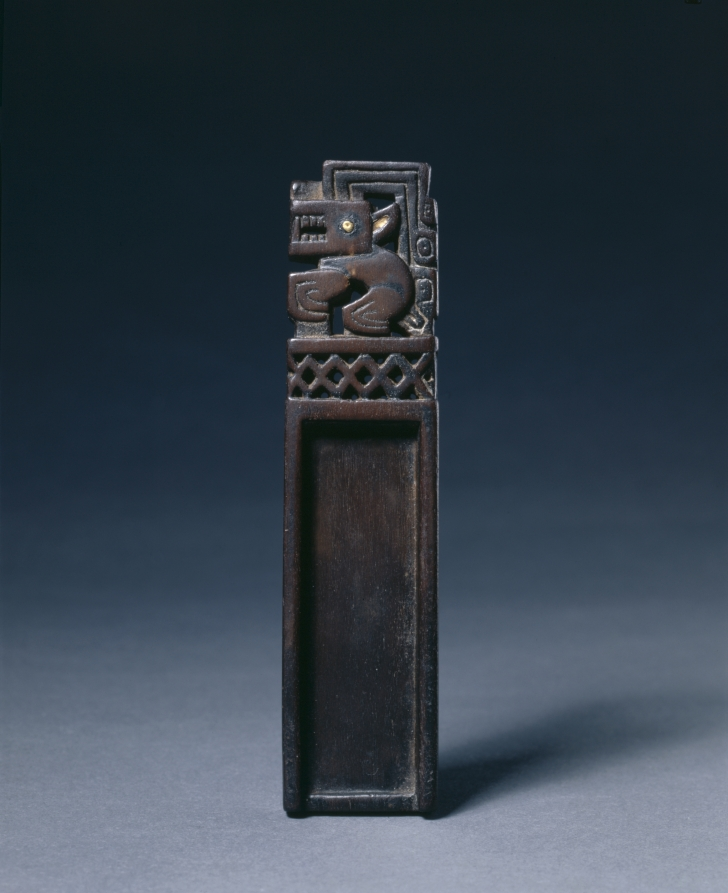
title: Snuff Tablet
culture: Peru, North Highlands, Recuay style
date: 1–650 CE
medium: wood with gold foil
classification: Furniture and woodwork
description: Both of these objects feature a creature known as the "Recuay feline," although it could also refer to a fox, dog, or viscacha (a rodent). Whatever its identity, the prominent crest on its head ties it to the supernatural realm, a connection underlined by the deity head that also appears on the dipper and by the ritual function of snuff tablets, which were used to inhale hallucinogenic snuffs during religious ceremonies.